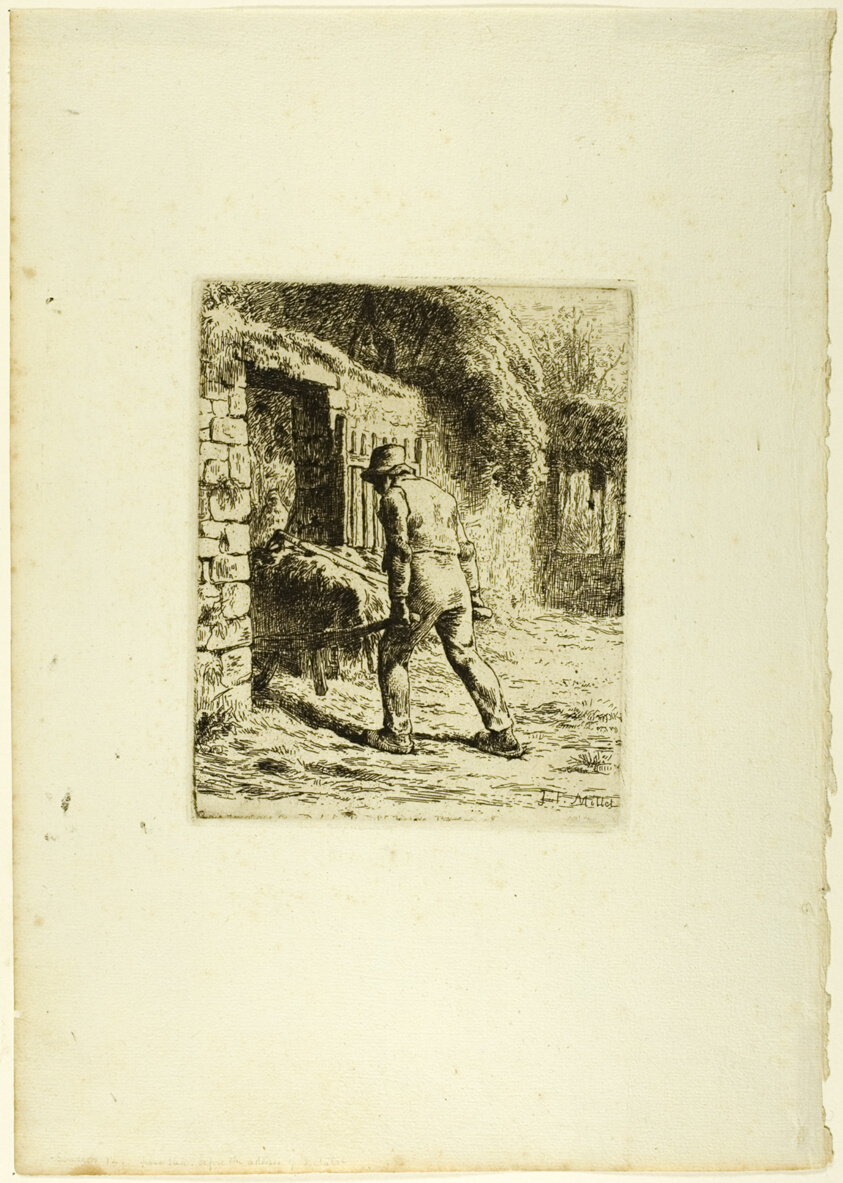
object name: Print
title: Peasant with a Wheelbarrow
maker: Jean François Millet (French, 1814-1875); printed by Auguste Delâtre (French, 1822-1907)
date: 1855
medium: Etching and drypoint on ivory laid paper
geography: France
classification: etching; print; prints and drawing